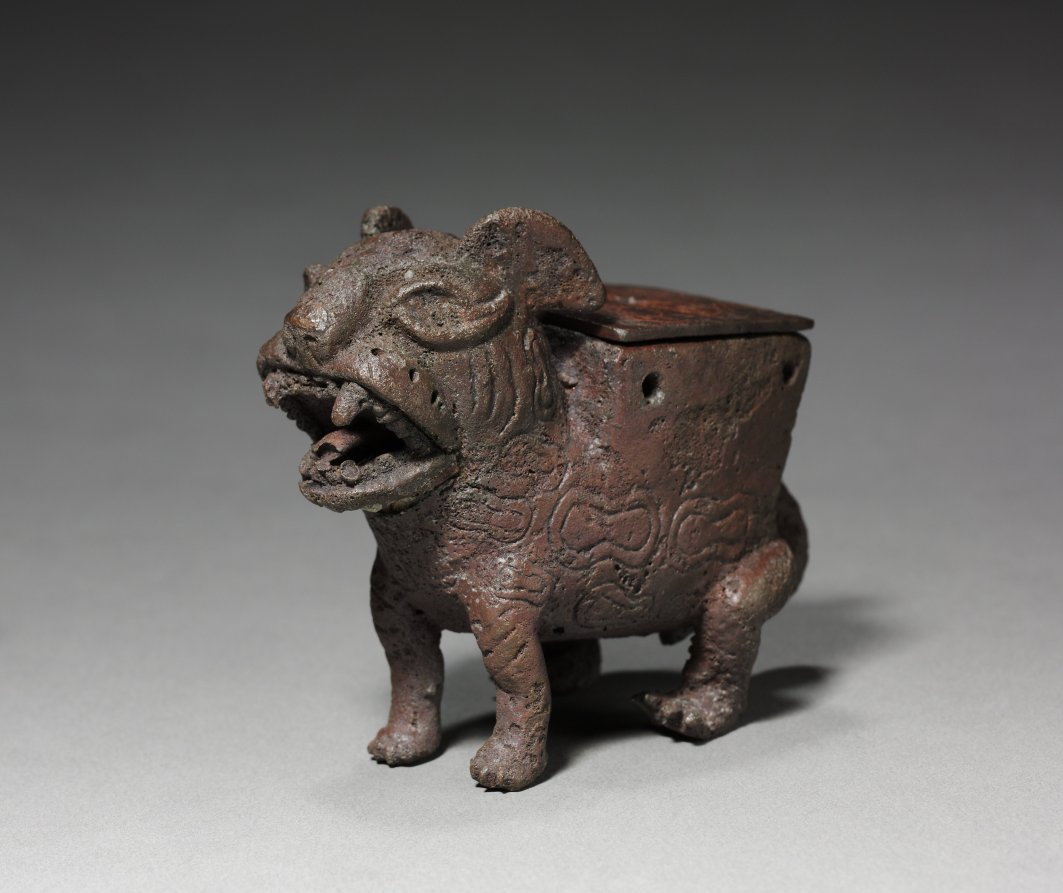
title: Male Feline-Shaped Container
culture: Peru, North Coast, Moche style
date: 50–800 CE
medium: cast copper alloy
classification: Sculpture